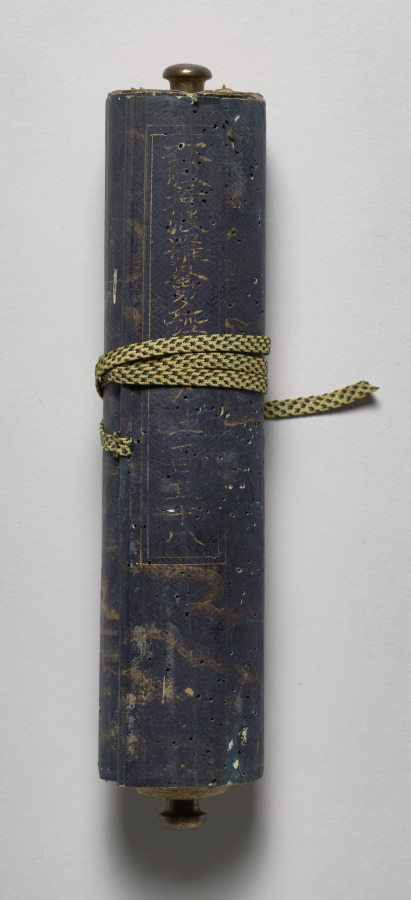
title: Volume from the Great Perfection of Wisdom Sutra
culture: Japan, Heian period (794–1185)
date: late 1100s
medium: Handscroll; ink and gold on dyed paper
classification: Manuscript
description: This scroll is part of the 600-volume Great Perfection of Wisdom Sutra. The sacred text addresses the perfection of wisdom and the nonsubstantiality of all phenomena, or the emptiness of all things. It takes the form of Shakyamuni Buddha’s preaching at four locations. This scroll is from the Perfection of Wisdom in 100,000 Lines, which occupies the first 400 volumes. At one time, religious clergy kept all the scrolls in a lacquered wood repository on view nearby. They are now too fragile to open and we will conserve them over time.